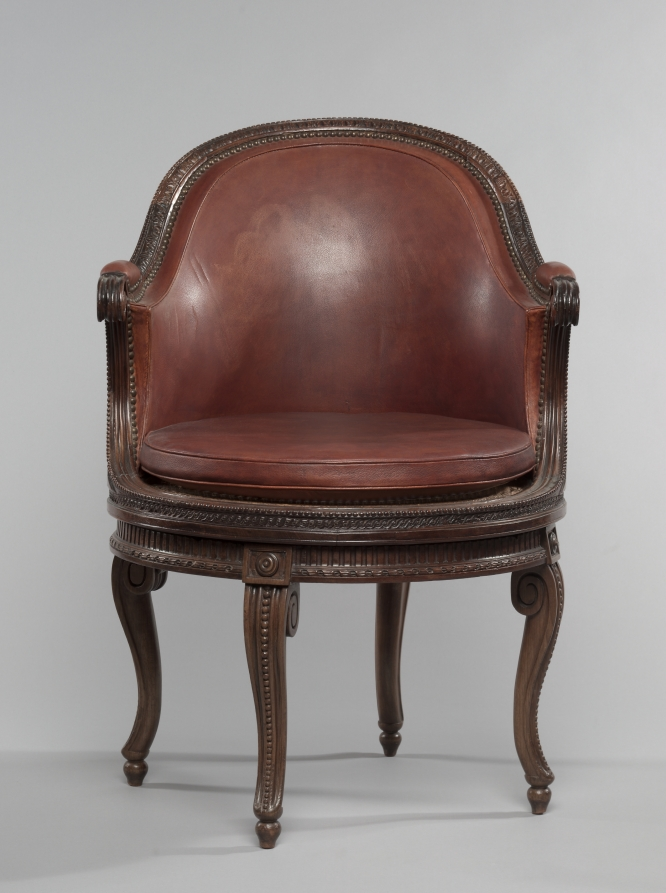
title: Desk Chair with Swivel Mechanism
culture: France, Paris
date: c. 1780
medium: walnut with caning and leather upholstery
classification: Furniture and woodwork